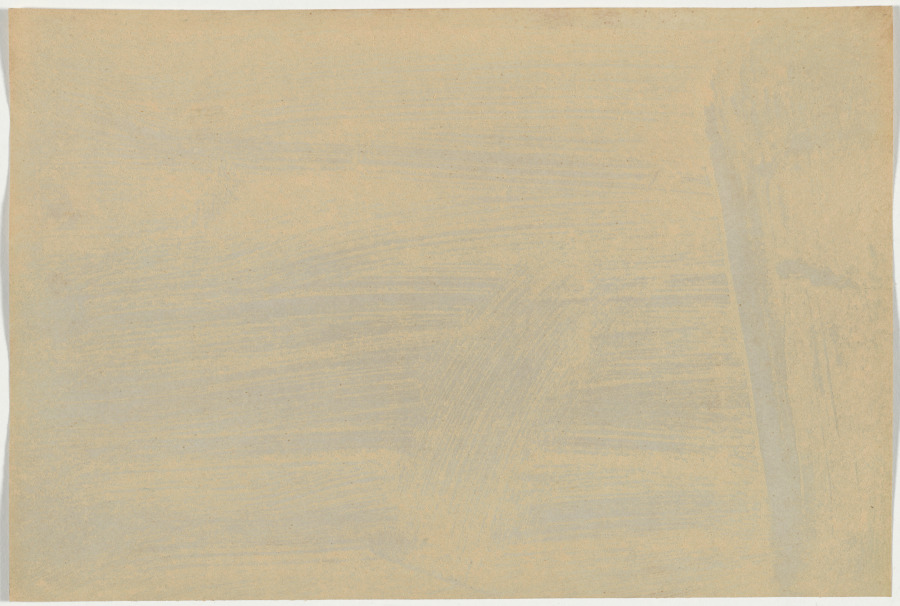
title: Elephant Battery on Parade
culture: India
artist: Raja Deen Dayal (Indian, 1844–1905)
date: 1886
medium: albumen print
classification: Photograph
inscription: No visible inscriptions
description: Exercises involving elephant batteries, which were exotic to European eyes, attracted spectators; photographs of them were excellent souvenirs of these military forces employed by the British Indian Army. Elephants had been employed in warfare in India since at least the 500s BC, but with the advent of heavy artillery, their function switched from attack to support. They transported big guns and supplies and worked in logging and construction. It took many cattle to pull a load that could be handled by two elephants.